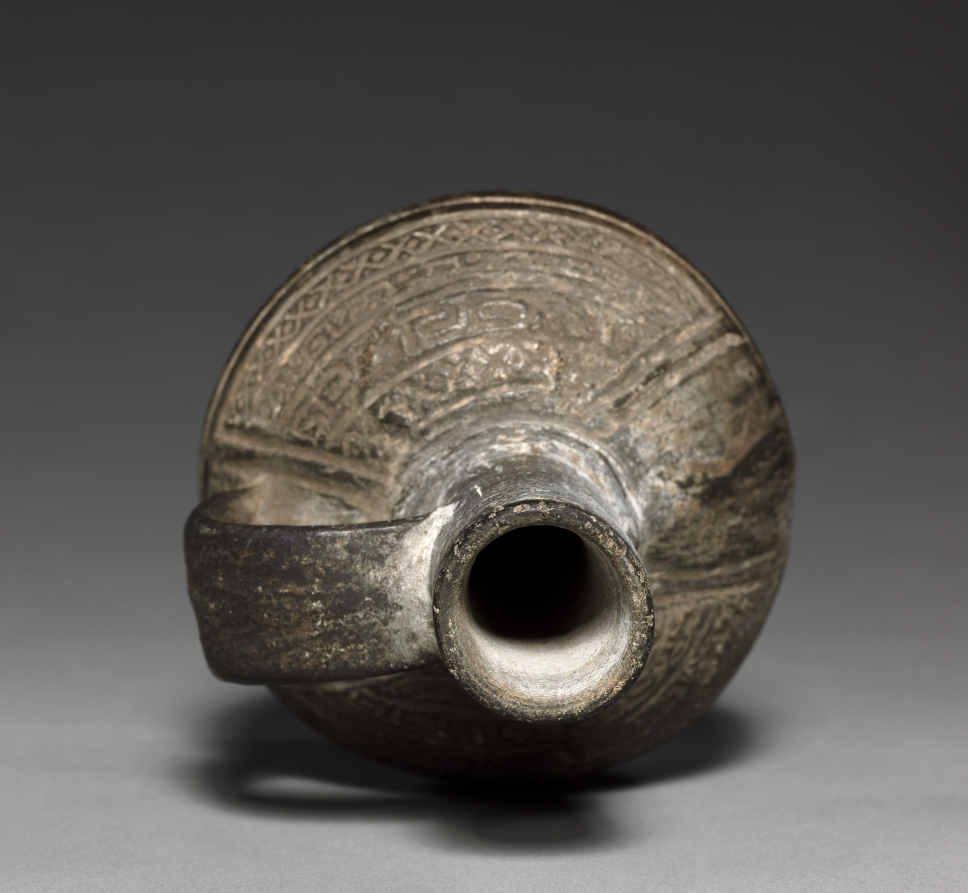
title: Bottle Vase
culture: Peru, Chimú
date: 1200–1400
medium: black ware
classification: Ceramic